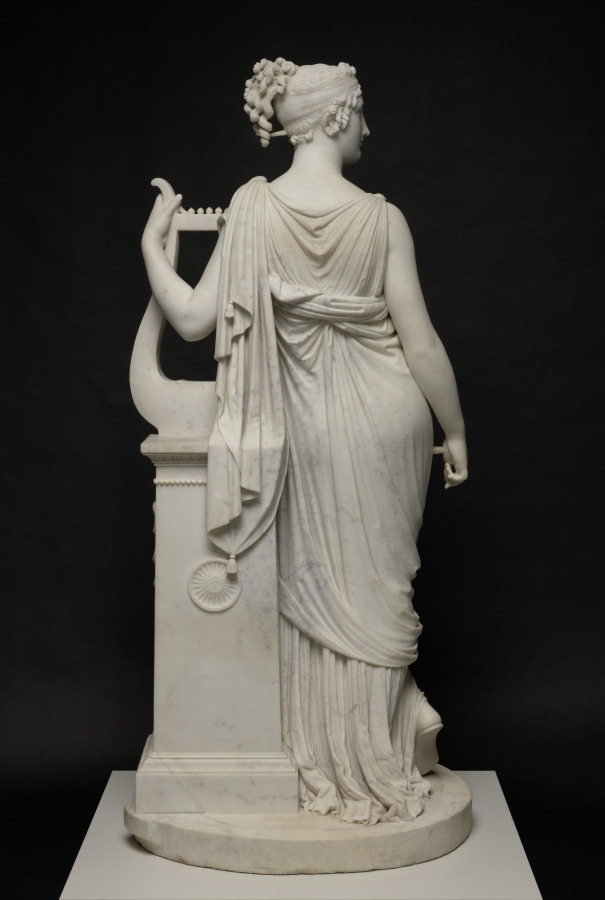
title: Terpsichore Lyran (Muse of Lyric Poetry)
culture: Italy, 19th century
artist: Antonio Canova (Italian, 1757–1822)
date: 1816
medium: marble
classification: Sculpture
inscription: inscribed on front of column: "Terpsichore Lyran" [Terpsichore as the Muse of lyric poetry]; inscribed at base of column: "Canova Fact: 1816"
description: In Greek mythology, Terpsichore was one of the nine Muses, or goddesses of creative inspiration. The lyre, the Greek inscription on the short column, and the caduceus (entwined snakes) on the side identify the figure as Terpsichore Lyran, muse of lyric poetry. This sculpture began with a commission from Napoleon's brother, Lucien, for an idealized portrait of his wife, Alexandrine. Antonio Canova made this version for a British aristocrat and exhibited it in 1817 at the Royal Academy in London to great acclaim.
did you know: Trained by his grandfather, an Italian stonemason, Canova began modeling clay and carving marble sculptures before age ten.